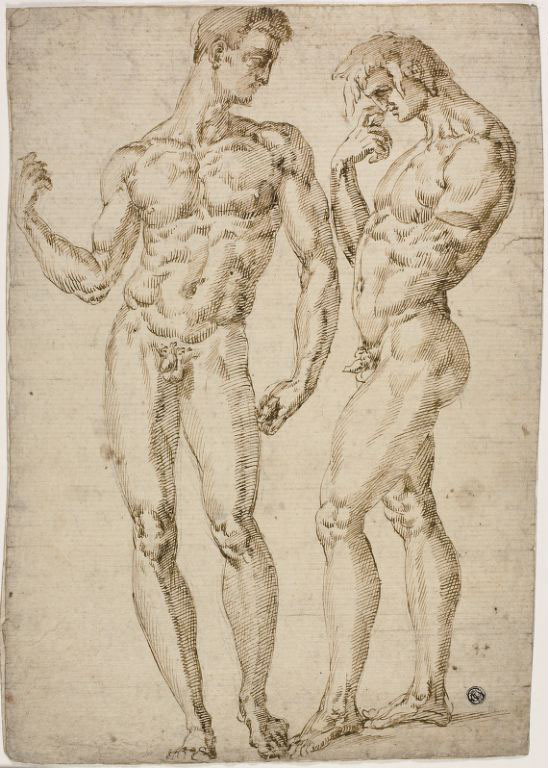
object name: Drawing and Watercolor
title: Two Standing Male Nudes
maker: School of Baccio Bandinelli (Italian, 1493-1560)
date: 1548/50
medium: Pen and brown ink, over black chalk, on ivory laid paper, laid down on ivory laid paper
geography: Italy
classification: pen and ink drawings; drawings (visual works); prints and drawing